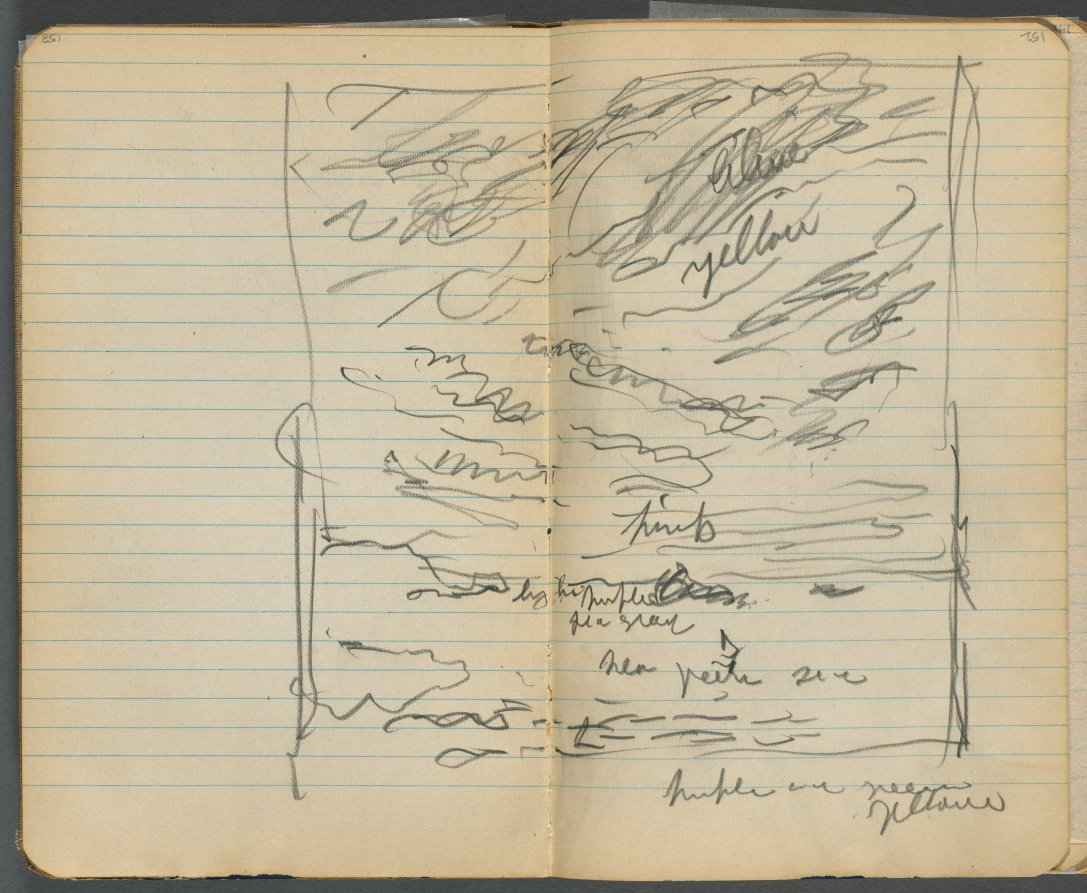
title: Sketchbook, page 152 & 153: View of the Sea with color notations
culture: America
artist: Maurice Prendergast (American, born Newfoundland [now Canada], 1858–1924)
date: 1905–10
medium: graphite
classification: Bound Volume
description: This sketchbook contains 69 pages of drawings, a diary largely devoted to the state of the artist's health, and a three-page discourse on the nature of genius and ideas.